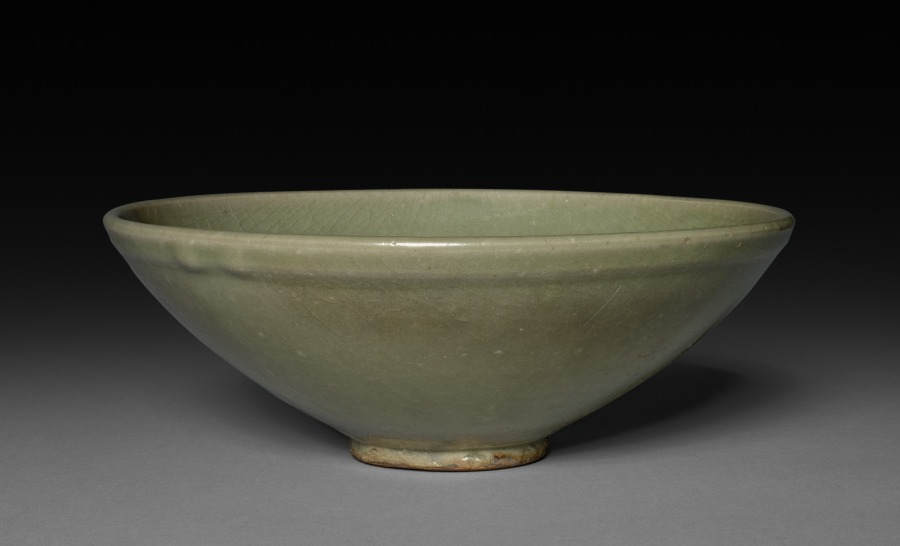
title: Bowl with carved floral decoration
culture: China, probably from the Yaozhou kilns, Shaanxi Province, Northern Song dynasty (960-1127)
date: 1100s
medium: Glazed porcelain, Northern Celadon ware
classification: Ceramic